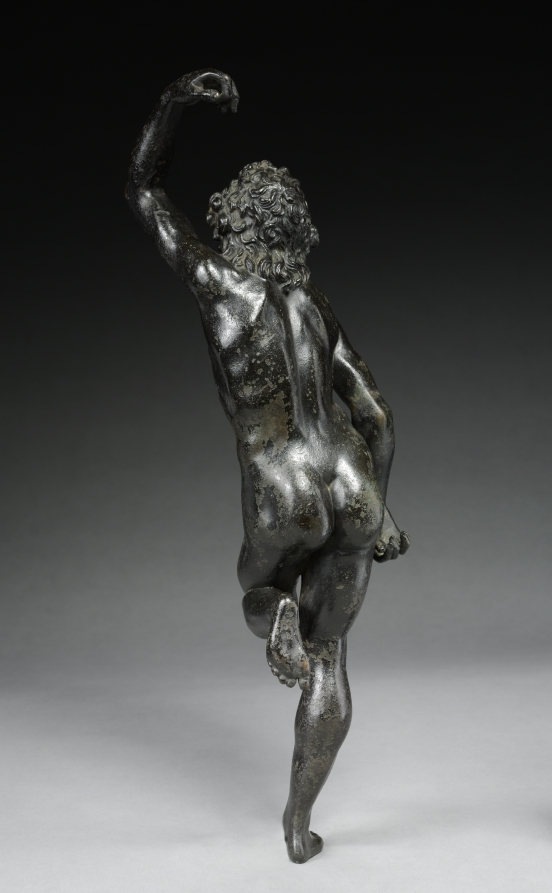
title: Saint Sebastian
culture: Germany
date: 1600s or later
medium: bronze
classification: Sculpture